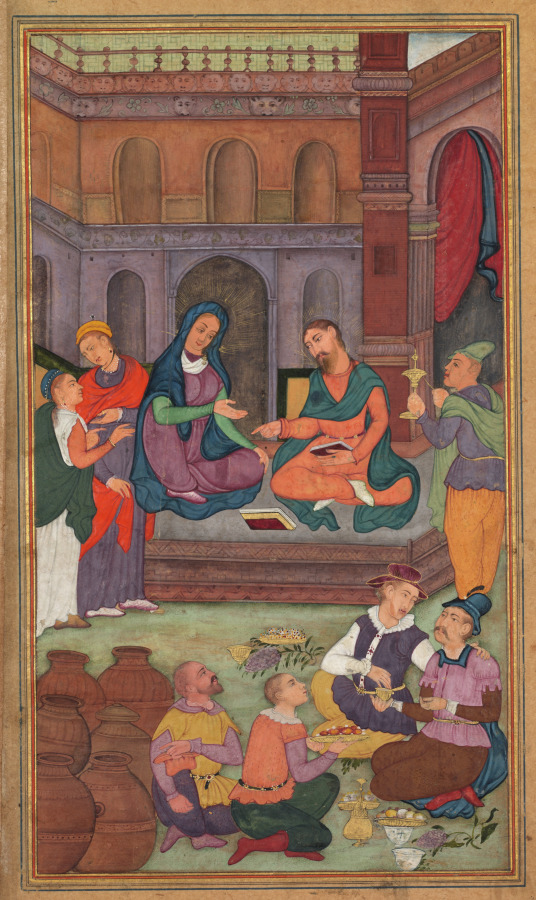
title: The Marriage at Cana (folio 58 verso), from a Mirror of Holiness (Mir’at al-quds) of Father Jerome Xavier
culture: Mughal India, Allahabad, made for Prince Salim (1569–1627)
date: 1602–4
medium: Gum tempera, ink, color, and gold on paper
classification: Manuscript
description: Mary and Jesus sit in places of honor at the wedding of her relatives in Cana in front of a building facade ornamented at the top with charming rows of animal faces. The text specifies that there were six water jars at the gathering, as depicted in the lower left. The wine master in the yellow tunic gestures to the jars, as he admonishes the host for saving the good wine for last. The dumbstruck host, who knew there was no more wine, has discovered that Jesus miraculously transformed the water into wine. The figure wearing the crimson velvet hat with his hand on the host’s shoulder is probably the groom. The miracle inspired him to leave his bride a virgin and follow Christ as the apostle John.